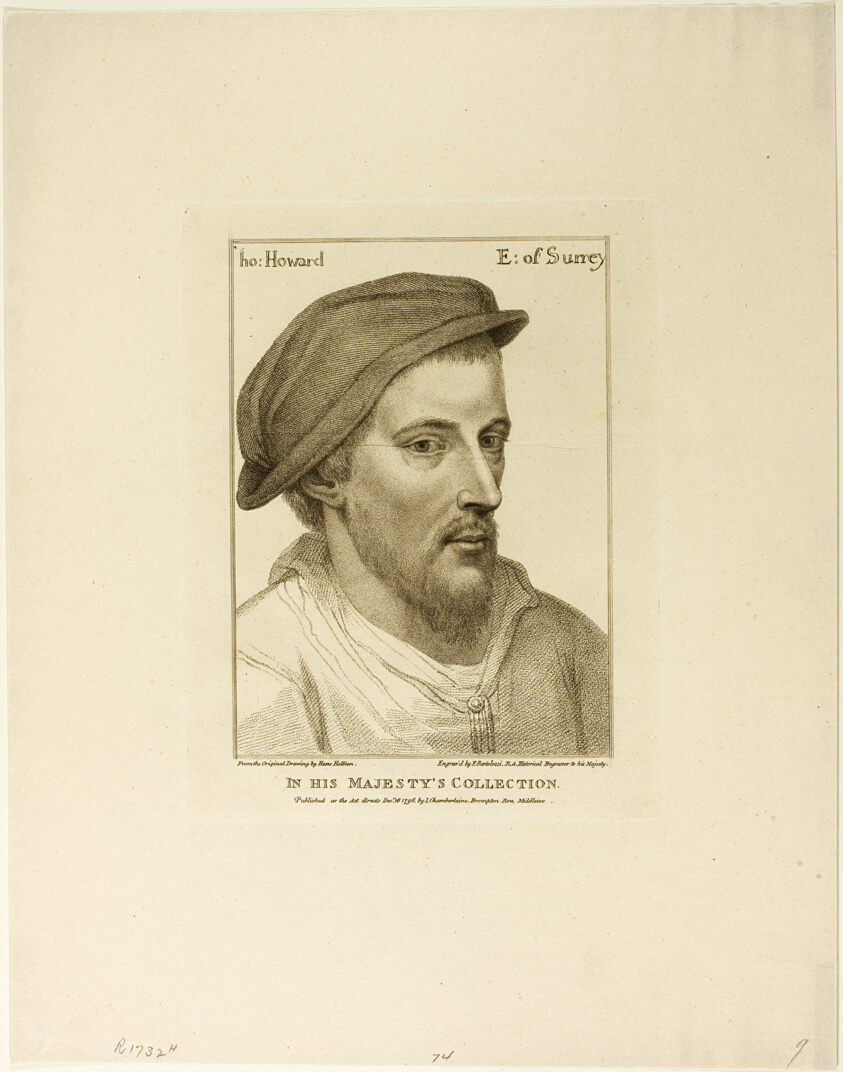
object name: Print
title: Thomas Howard, Earl of Surrey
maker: Francesco Bartolozzi (Italian, 1727-1815); after Hans Holbein the younger (German, 1497-1543)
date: December 16, 1796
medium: Stipple engraving on cream wove paper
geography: Italy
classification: engraving; print; prints and drawing